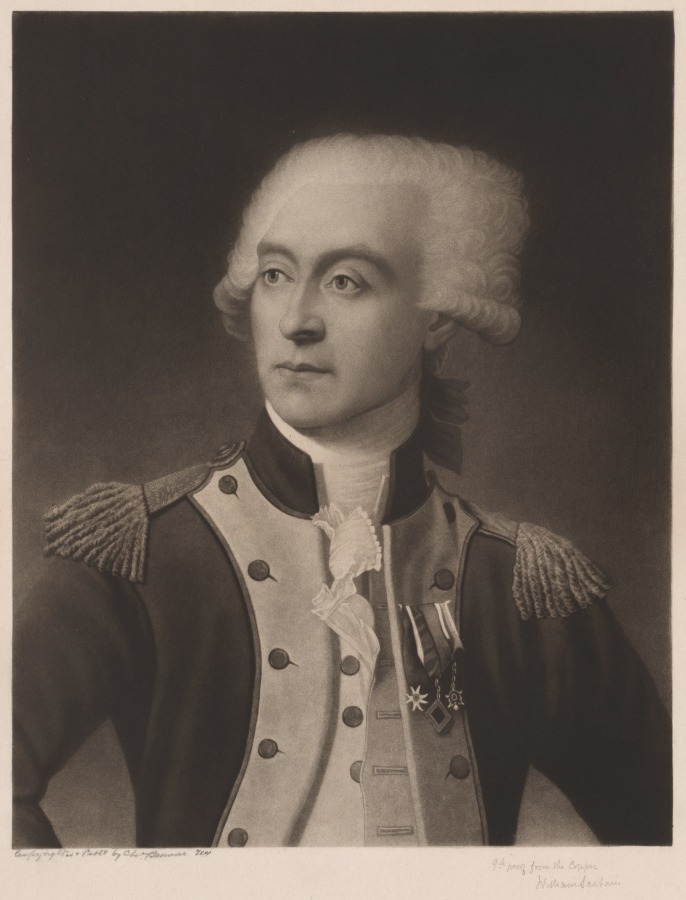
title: Portrait of a Man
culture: America, late 19th-early 20th century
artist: William Sartain (American, 1843–1924)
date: c. 1800s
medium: mezzotint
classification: Print